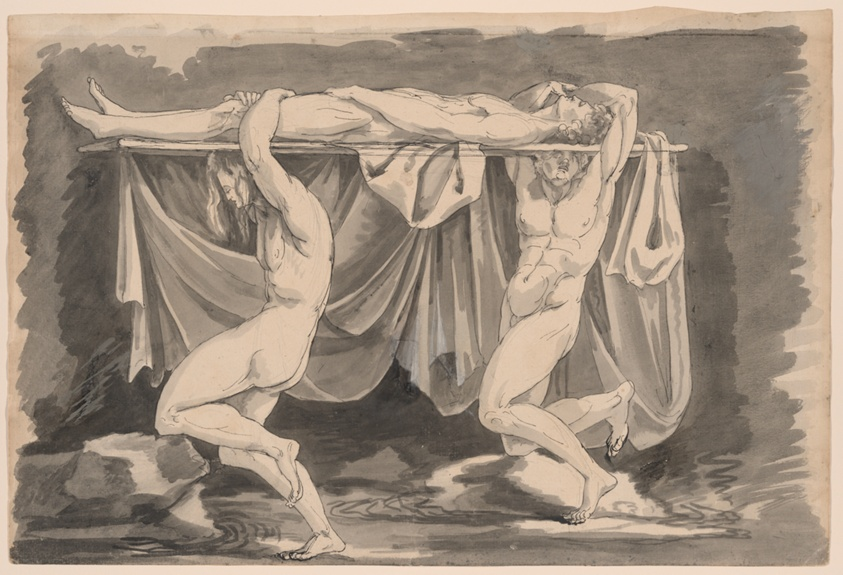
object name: Drawing and Watercolor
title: A Hero Born on a Bier, from The Master of Giants Portfolio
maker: Prince Hoare (British, 1755-1834)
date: 1779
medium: Brush and black ink wash, with pen and black ink and opaque white and gray watercolor, on cream laid paper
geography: Great Britain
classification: prints and drawing; brush and wash; drawing; paper